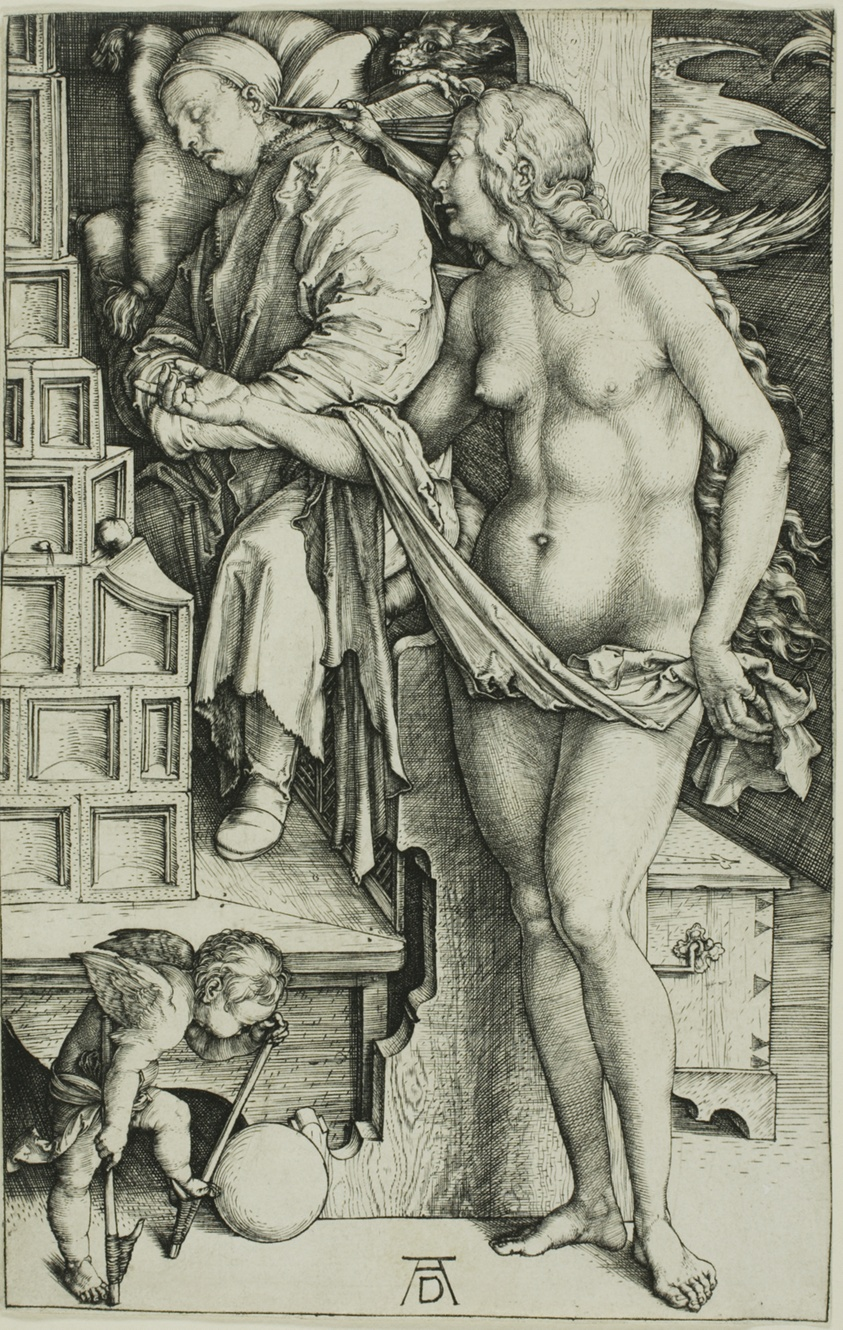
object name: Print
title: The Temptation of the Idler (The Dream of the Doctor)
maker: Albrecht Dürer (German, 1471-1528)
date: c. 1498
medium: Engraving in black on ivory laid paper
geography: Germany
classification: engraving; print; prints and drawing; paper